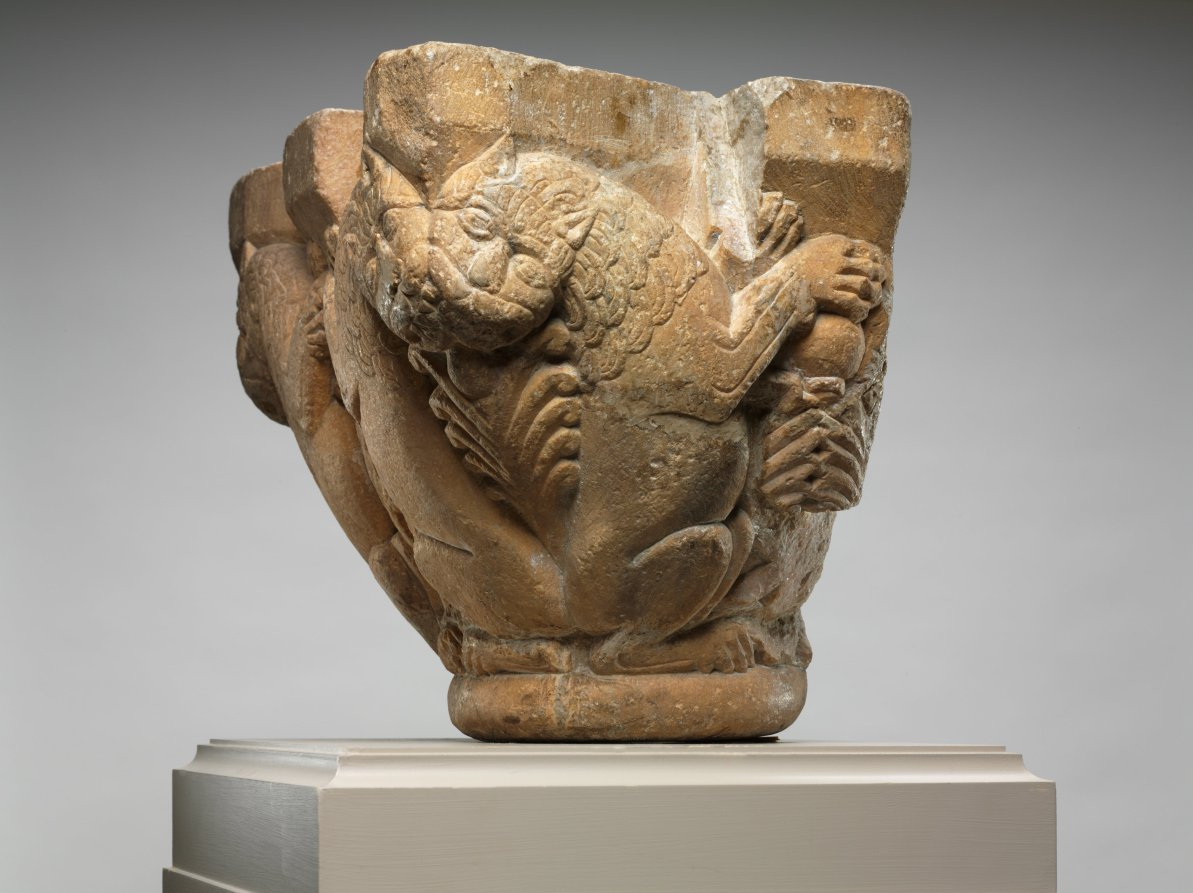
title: Engaged Capital with Lions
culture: Northern Spain (Navarre ?) or Southwest France (Pyrénées or Roussillon ?), mid-12th century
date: 1145–64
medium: marble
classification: Sculpture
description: The compositional motif of confronted and addorsed beasts illustrated on this capital was especially popular in churches along the pilgrimage roads.